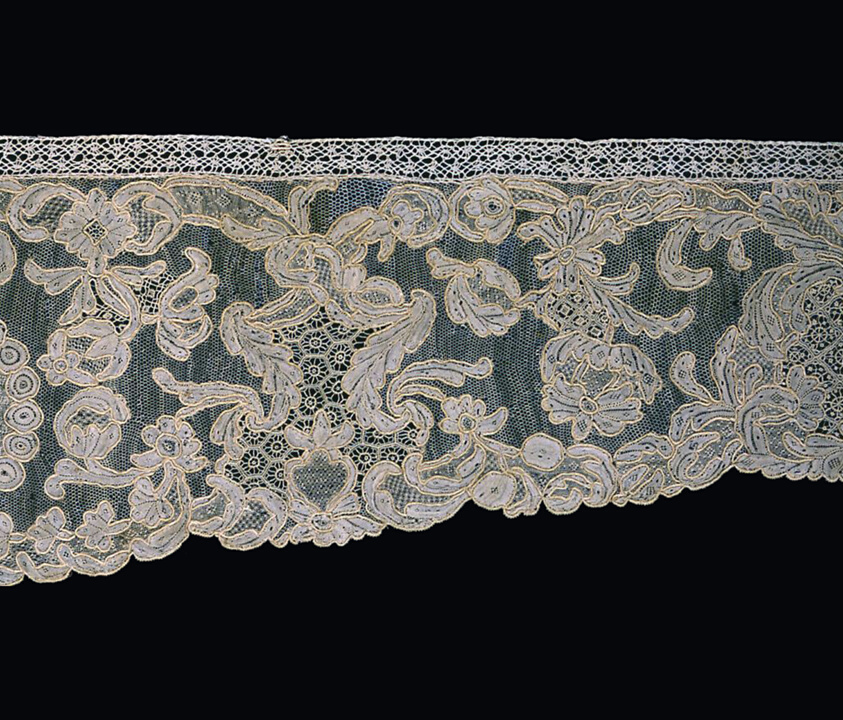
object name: Costume and Accessories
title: Sleeve Ruffle (Engageante) and Lappets (Joined)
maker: France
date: 1740s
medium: Linen, needle lace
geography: France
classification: costume accessory; lace - needle; textile; costume; costume accessory - headdress; costume accessory worn above the waist